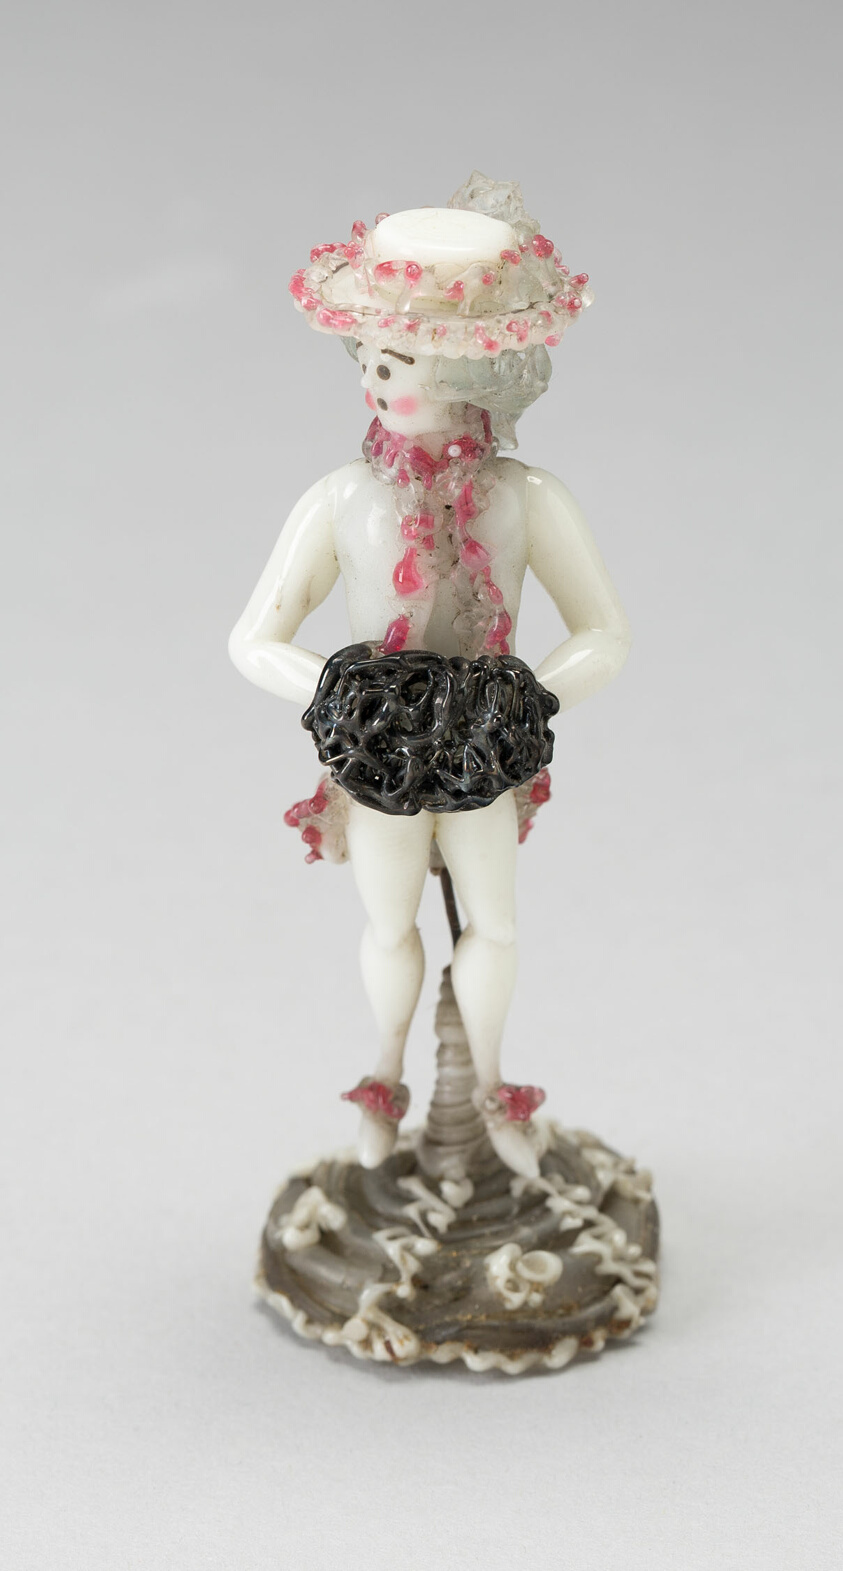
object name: Glass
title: Man Holding a Black Muff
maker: Nevers, France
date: 1750/99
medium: Glass; lampwork (verre de Nevers), metal armature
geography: France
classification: decorative object/ornament; lampwork; glass; european decorative arts